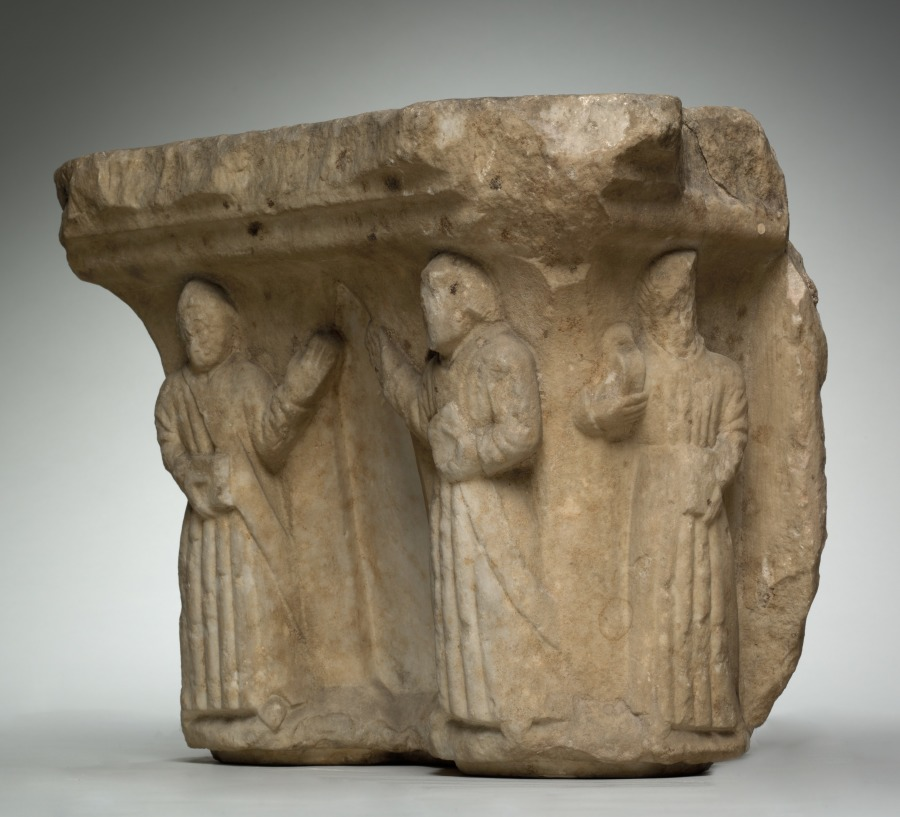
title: Engaged Capital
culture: Southern France, Abbey of Larreule, near Tarbes, 15th century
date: 1400s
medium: limestone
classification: Sculpture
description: This capital belongs to a surviving group including other architectural fragments that once decorated the cloister of the Abbey of Larreule. A cloister was a covered walkway or arcade, usually around all four sides of a square area of grass (the "cloister garth"). The seclusion of the cloister was the monks’ exclusive domain, off limits to others. Here, the monks were supposed to pray, study, meditate, and exercise in privacy and solitude. Such cloister capitals served both to instruct the monks and as a focus for their devotions. Other capitals in this series are installed in the Jardin Massey at Tarbes, near the original abbey. An arch from Larreule has been assembled with other associated French capitals at The Cloisters in New York.